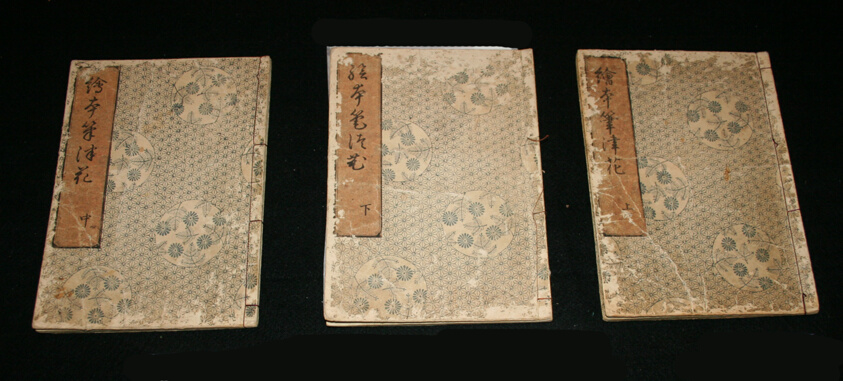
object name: Book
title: Ehon fudetsu bana (0010-0012)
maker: Nishikawa Sukenobu (Japanese, 1671-1750); Kihei Kikuya (publisher) (Japanese, 18th century)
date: 1747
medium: Woodblock printed books, three volumes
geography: Japan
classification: book; asian art